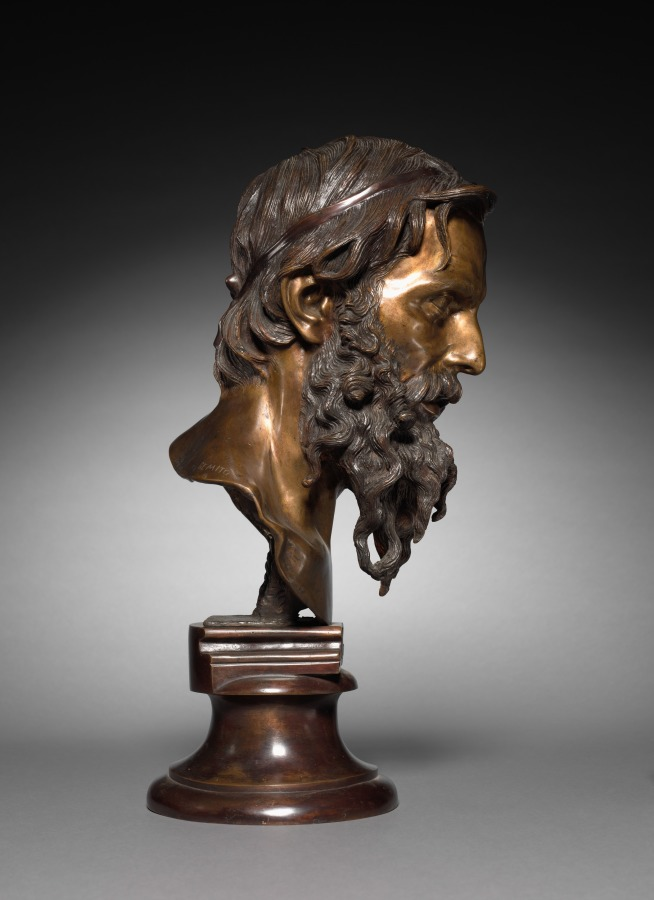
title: Head of a Philosopher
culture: Italy, 19th century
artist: Vincenzo Gemito (Italian, 1852–1929)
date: 1883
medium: bronze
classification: Sculpture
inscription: Signed: "Gemito"; stamped: "FONDERIA GEMITO NAPOLI"